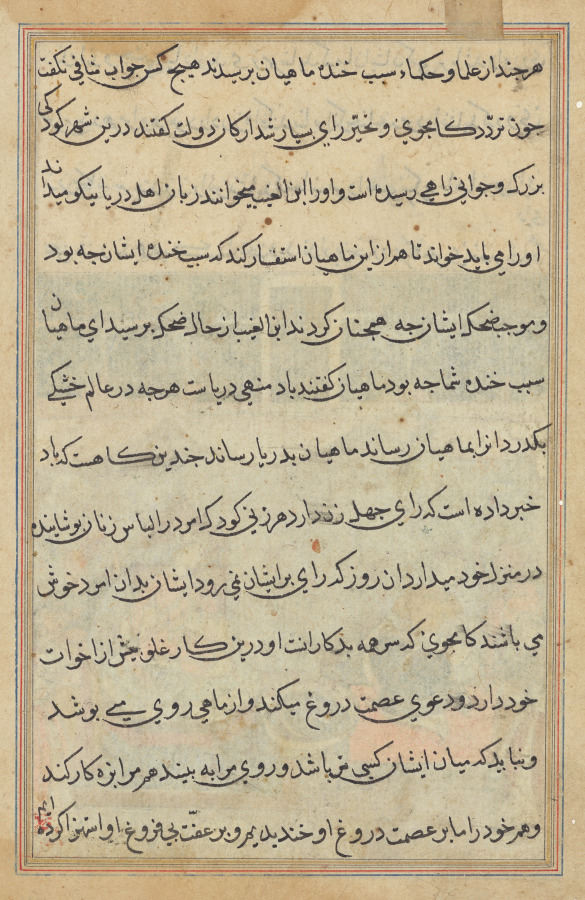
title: Page from Tales of a Parrot (Tuti-nama): text page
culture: Mughal India, court of Akbar (reigned 1556–1605)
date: c. 1560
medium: gum tempera, ink, and gold on paper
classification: Painting